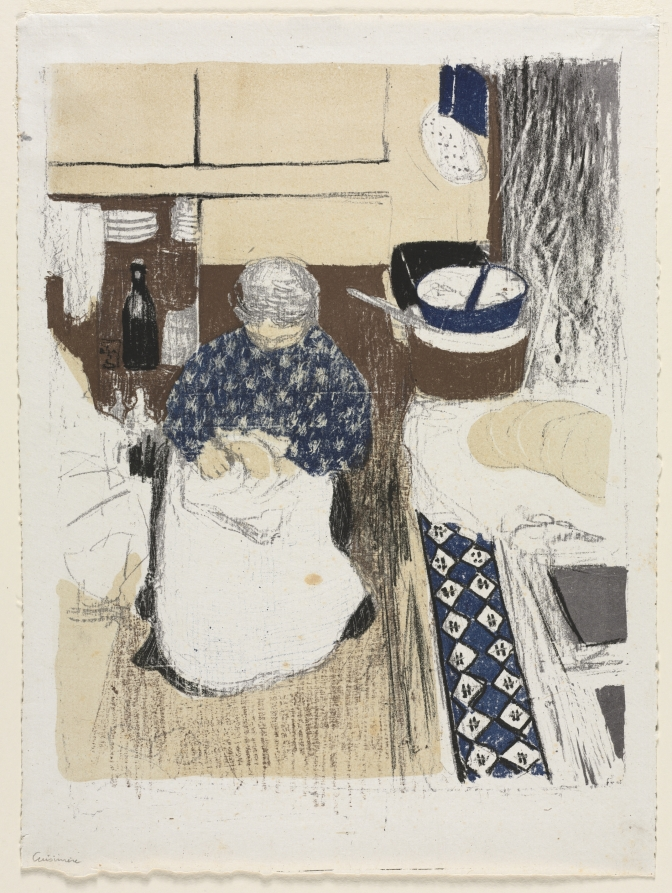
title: The Cook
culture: France, 19th century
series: Landscapes and Interiors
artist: Édouard Vuillard (French, 1868–1940)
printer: Auguste Clot (French, 1858–1936)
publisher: Ambroise Vollard (French, 1867–1939)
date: 1899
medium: color lithograph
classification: Print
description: The artist’s mother was known for her hospitality toward her son’s Nabi friends, who occasionally dined in the Vuillards’ apartment. Madame Vuillard reigned in the kitchen, but here,the artist depicts her as diminutive and frozen, part of the still life of objects and patterns of the room.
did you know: Despite living in close quarters, Vuillard’s mother was known to warmly host and cook for her son’s Nabi friends.